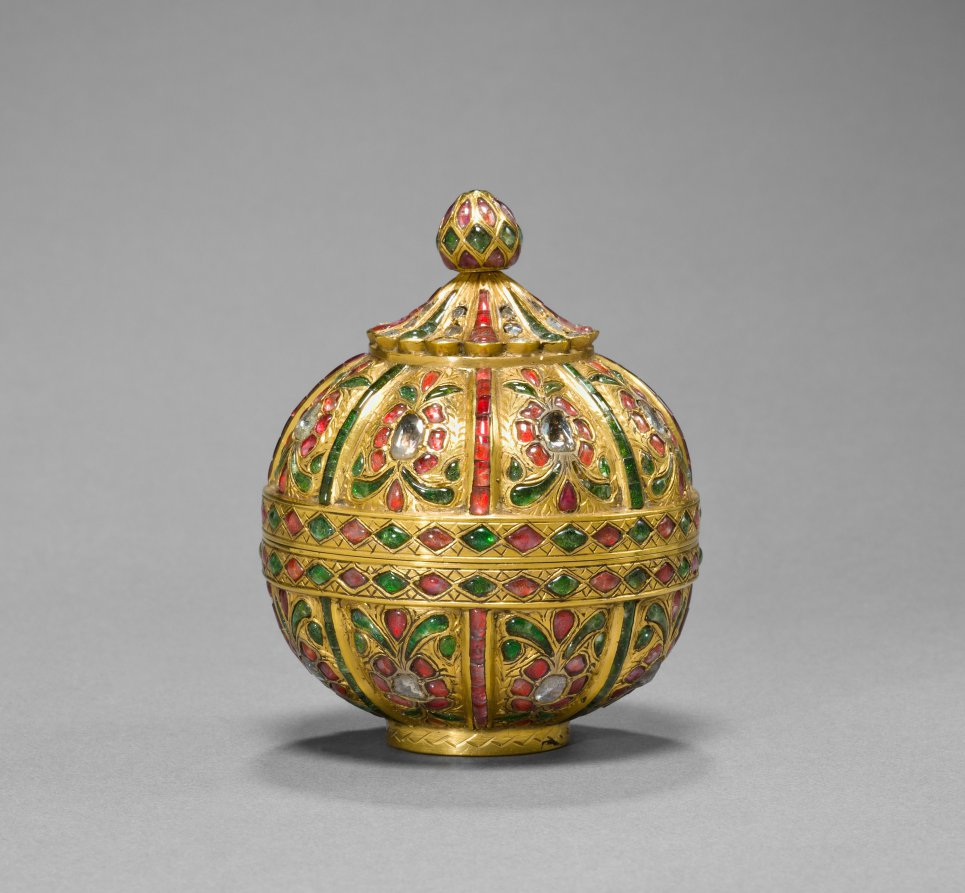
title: Globular-Shaped Box Decorated with Gems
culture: India, Mughal dynasty (1526-1756)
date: 1700s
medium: gold paste and clear and colored rock crystal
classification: Metalwork